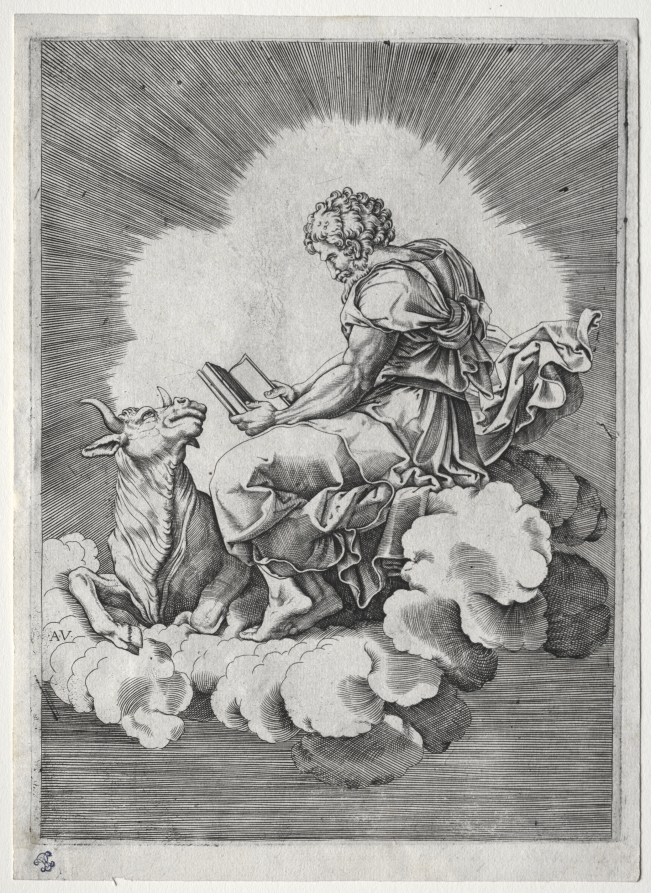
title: The Four Evangelists: St. Luke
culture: Italy, 16th century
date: c. 1518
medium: engraving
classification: Print